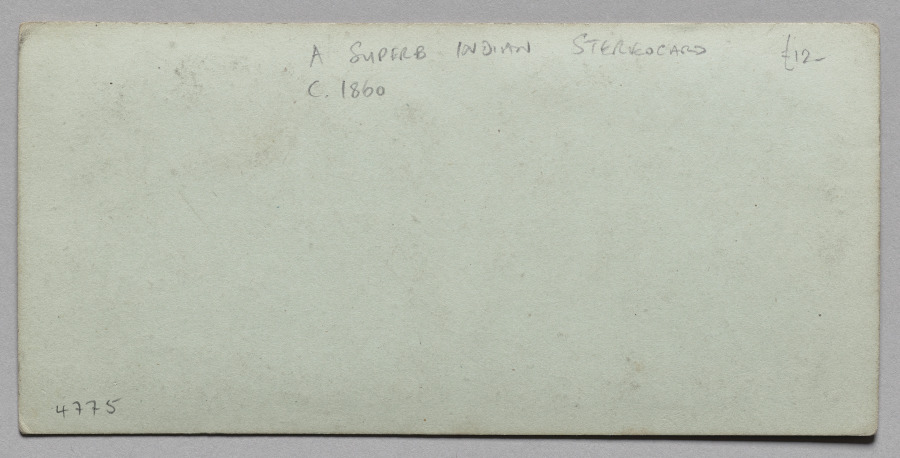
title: Tamil Gateway (Gopura), Tamil Nadu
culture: Unknown, 19th century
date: c. 1860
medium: stereoscopic albumen print from glass plate negative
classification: Photograph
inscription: Written in pencil on verso of mount: “very fine quality photograph £10/c. 1860/4776”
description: A stereograph, when seen through a viewer, produces the illusion of a three-dimensional scene and creates a “you-are-there” sensation. This stereo view documents a Hindu temple in the southern Indian state of Tamil Nadu. The high gopura or gatehouse leading into the temple precinct is characteristic of medieval temples constructed in that region. Popular beginning with their introduction to the public in London in 1851, stereographs inspired a sense of awe that would have compounded a viewer’s impression of India’s architectural wonders.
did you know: Stereographs were introduced to the public in London in 1851 and became wildly popular from the 1860s to around 1930.